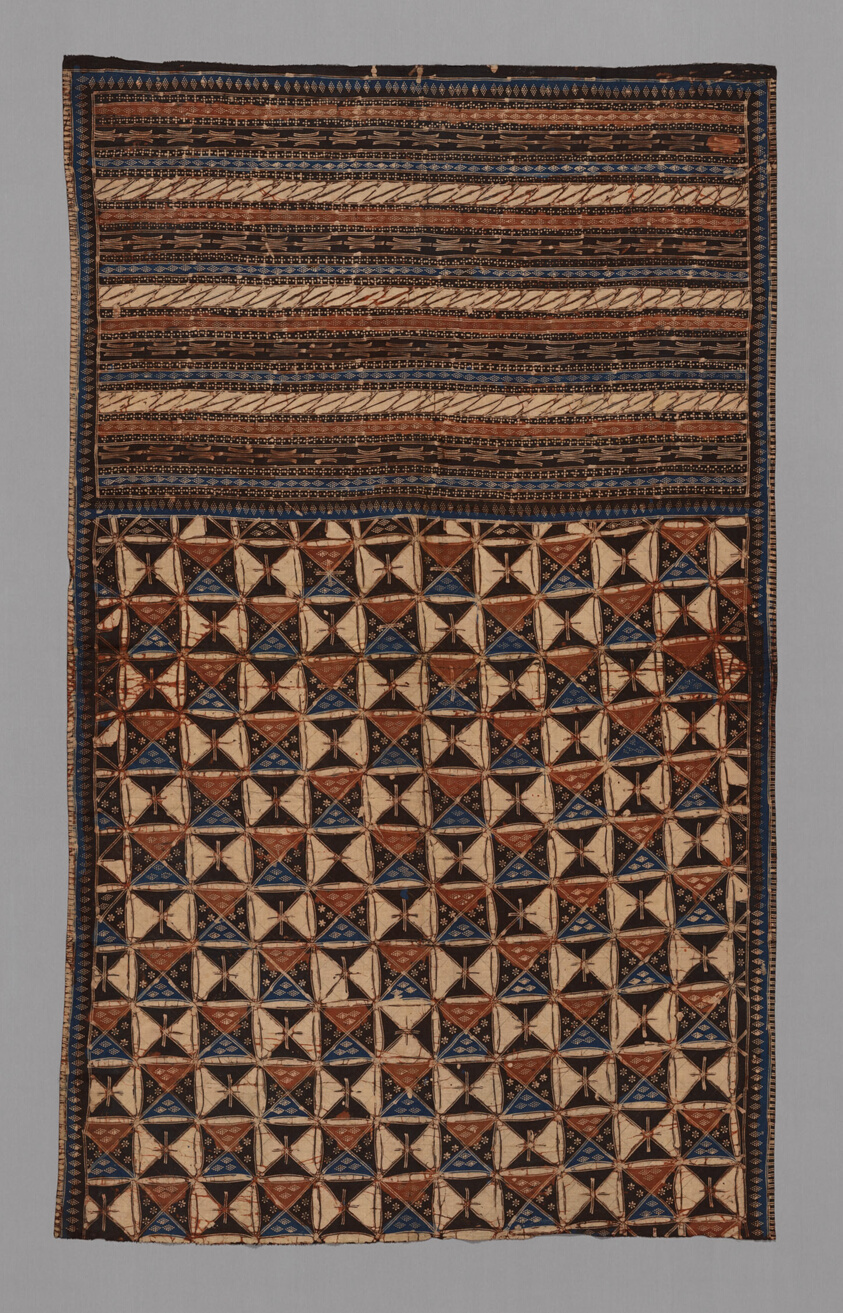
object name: Costume and Accessories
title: Selendang (Shawl) or Belt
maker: Indonesia, Java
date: 1775/1825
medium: Batik dyed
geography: Java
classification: textile; weaving - printed; weaving; costume; dress (garment); clothing